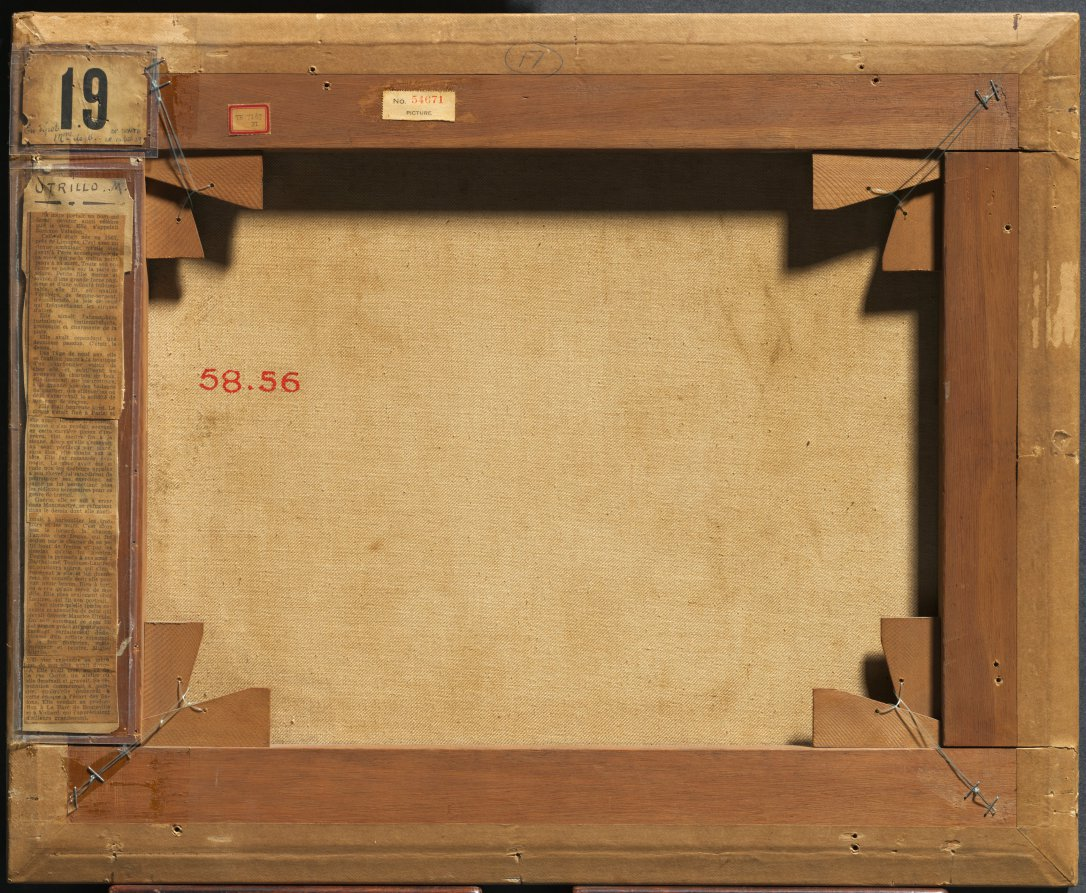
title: The Circus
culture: France, 19th century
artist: attributed to Suzanne Valadon (French, 1865–1938)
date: 1889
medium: oil on fabric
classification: Painting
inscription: Signed lower right, carved into wet paint with blunt end of brush: Suzanne Valadon 89 Souvenir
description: The attribution of this painting to Suzanne Valadon has been rejected by several authorities. Others support the attribution, arguing that the painting is merely atypical because it is an early work, signed and dated 1889. Valadon did not begin to develop her mature style until 1891.She was the mother of artist Maurice Utrillo and a prolific painter herself, although she never received any formal artistic training.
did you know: Besides being a prolific painter, Suzanne Valdon served as the model for Pierre-Auguste Renoir and Henri de Toulouse-Lautrec.